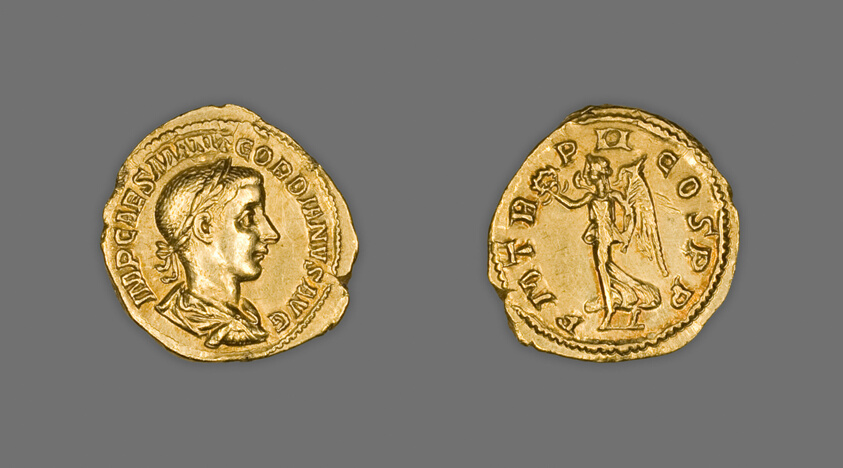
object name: Coin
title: Aureus (Coin) Portraying Emperor Gordian III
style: roman (ancient, style or period), ancient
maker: Roman, minted in Rome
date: 239 (late July-December), issued by Gordian III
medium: Gold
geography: Rome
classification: coin; ancient art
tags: portraits